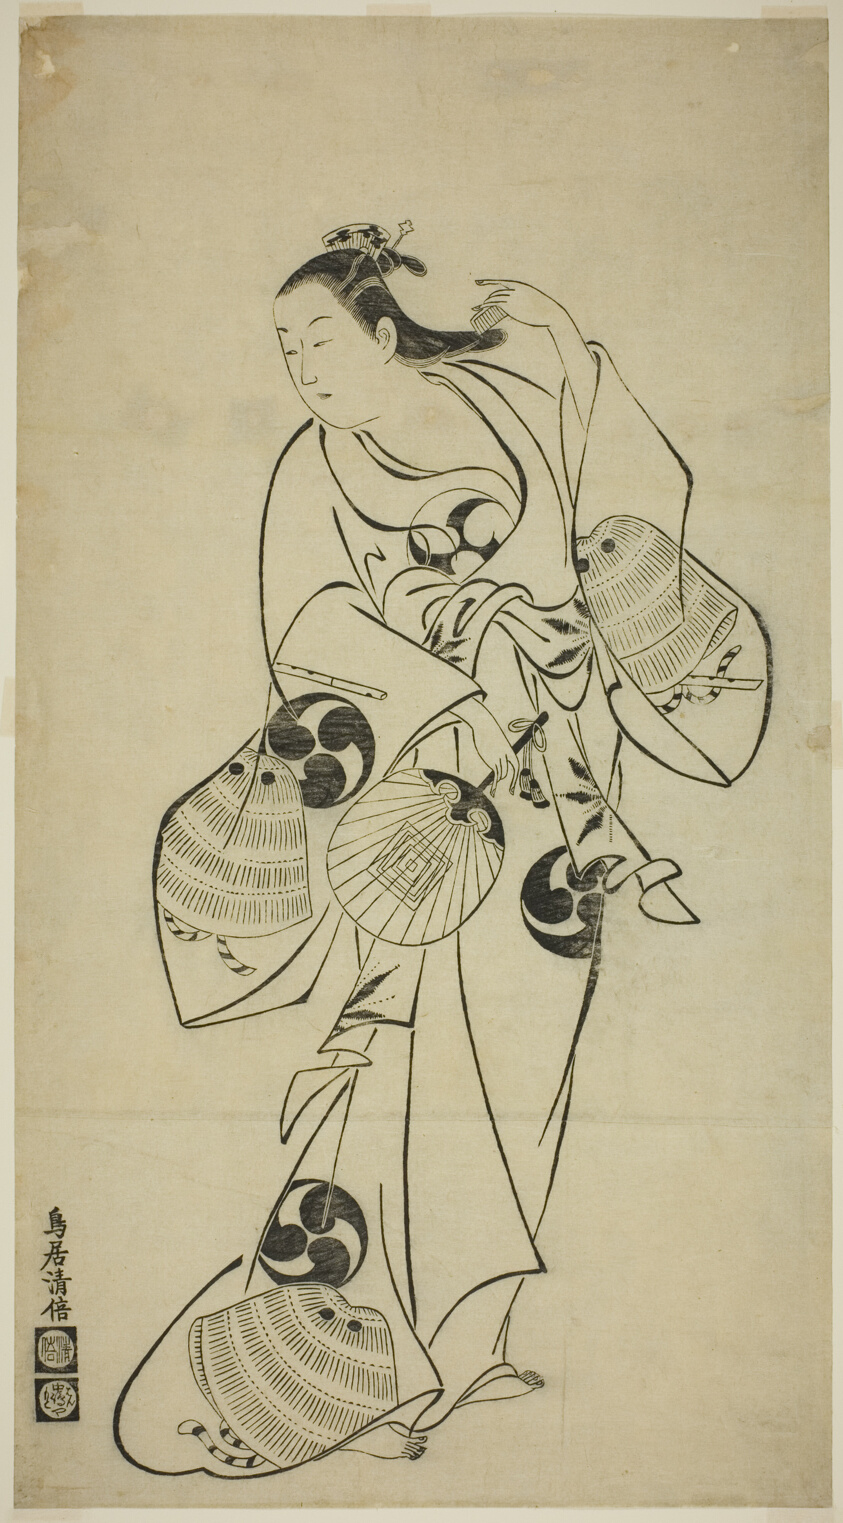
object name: Print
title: Actor as a Standing Beauty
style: Japanese (culture or style)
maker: Torii Kiyomasu I (Japanese, active c. 1704-18)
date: About 1715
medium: Woodblock print; sumizuri-e, kakemono-e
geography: Japan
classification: woodblock print; print; asian art; woodblock